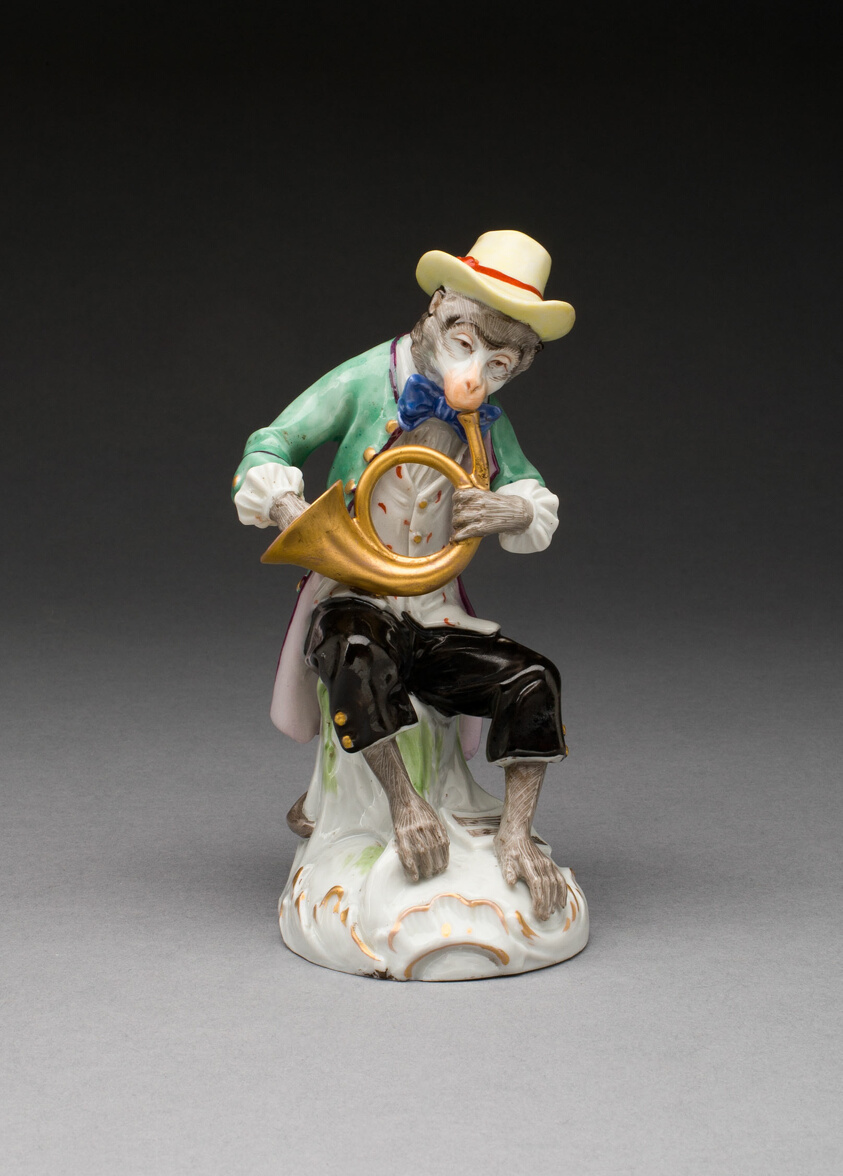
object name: Ceramics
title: French Horn Player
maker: Vienna State Porcelain Manufactory (Austrian, 1744-1864)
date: c. 1760/70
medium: Hard-paste porcelain, polychrome enamels, and gilding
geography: Vienna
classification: sculpture; porcelain; european decorative arts; ceramics